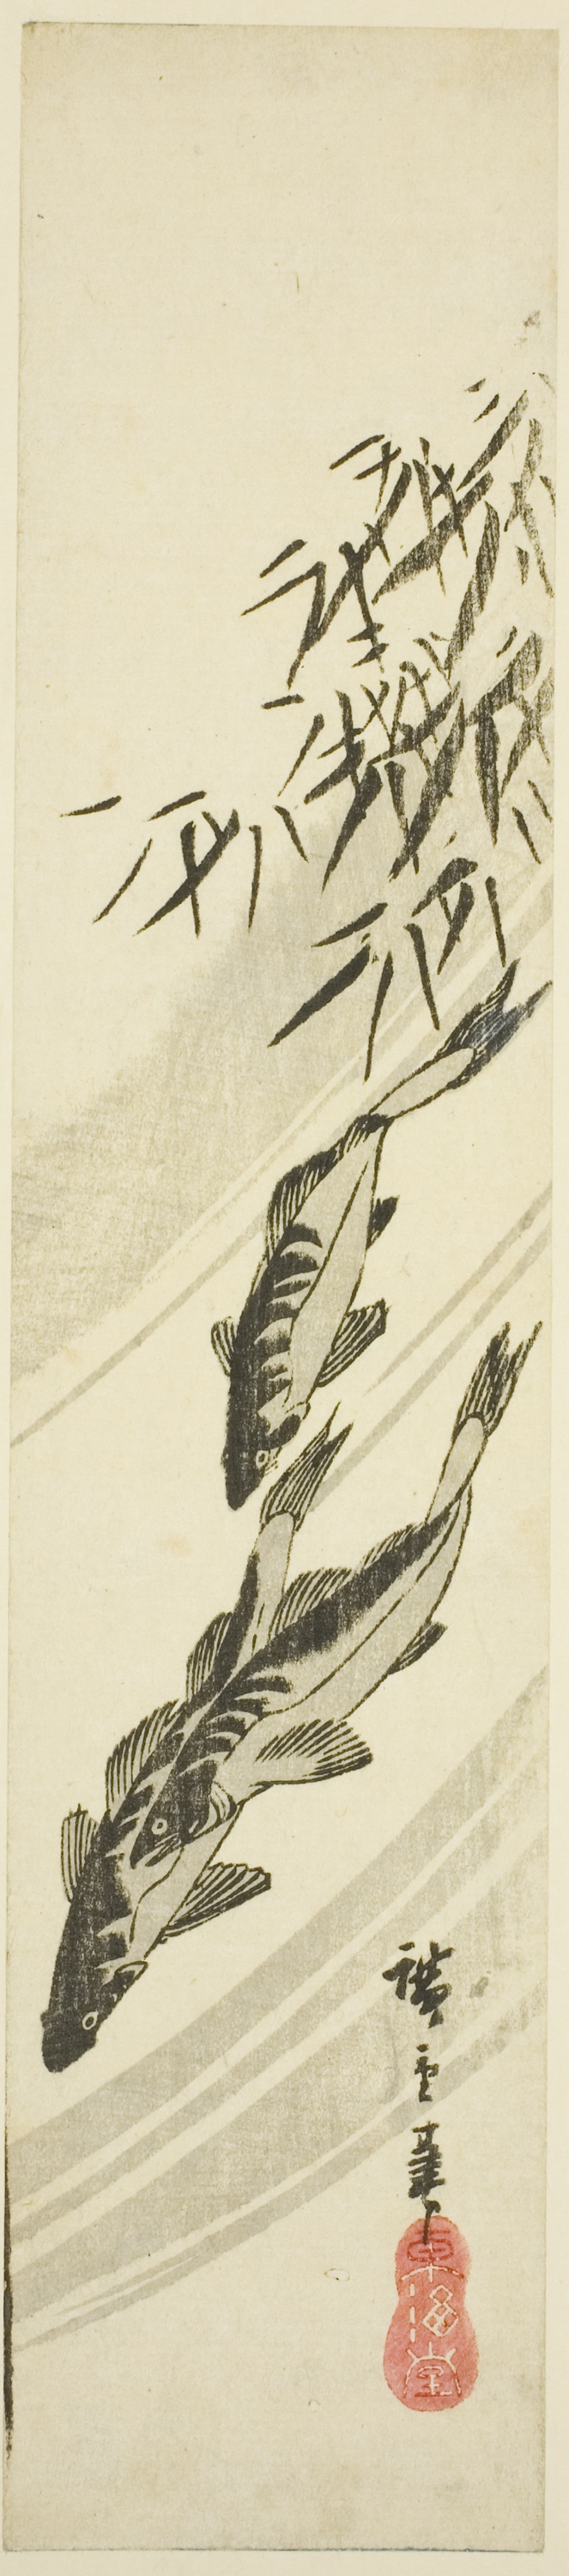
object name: Print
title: Fish in a stream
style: Japanese (culture or style)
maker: Utagawa Hiroshige 歌川 広重; Japanese, 1797-1858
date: c. 1840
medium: Color woodblock print; kotanzaku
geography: Japan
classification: woodblock print; print; asian art